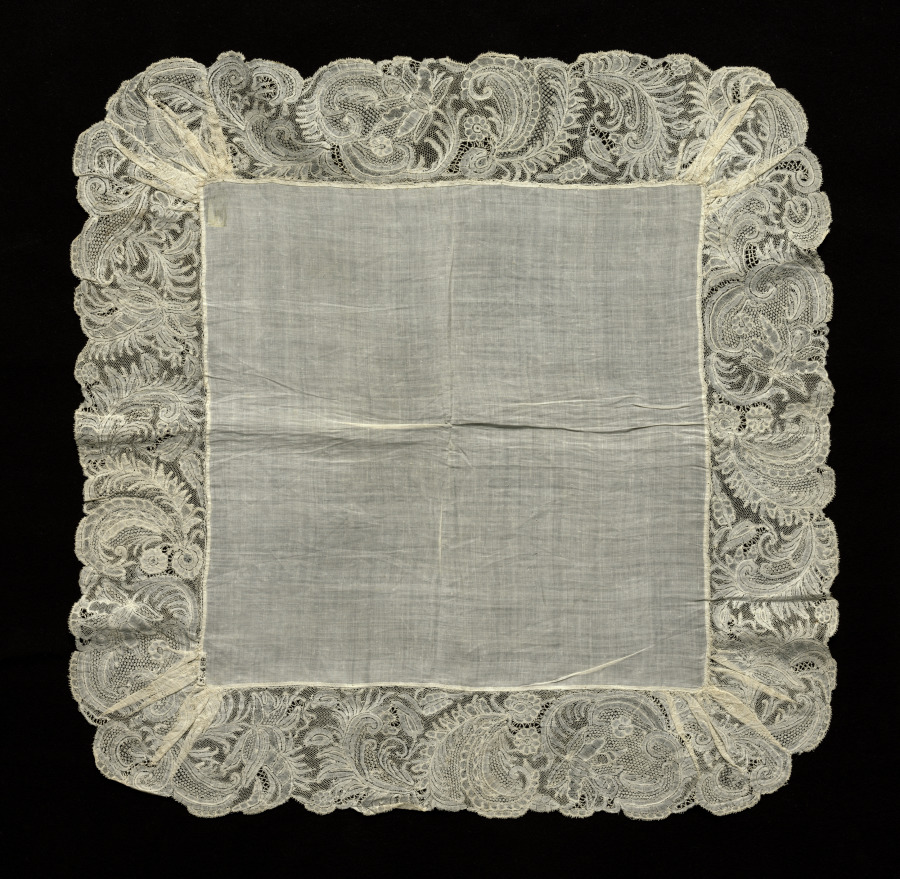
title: Lace Handkerchief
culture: Belgium, Brussels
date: 1700–1750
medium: Plain weave linen center with bobbin lace (Point d'Angleterre) edging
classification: Lace